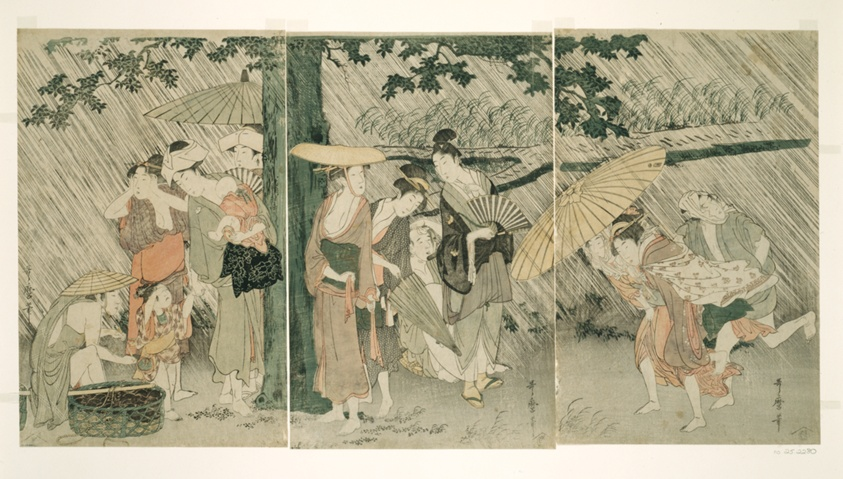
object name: Print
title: Sheltering from a Sudden Shower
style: Japanese (culture or style)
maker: Kitagawa Utamaro 喜多川 歌麿; Japanese, 1753 (?)-1806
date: c. 1799/1800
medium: Color woodblock print; oban triptych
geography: Japan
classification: woodblock print; print; asian art